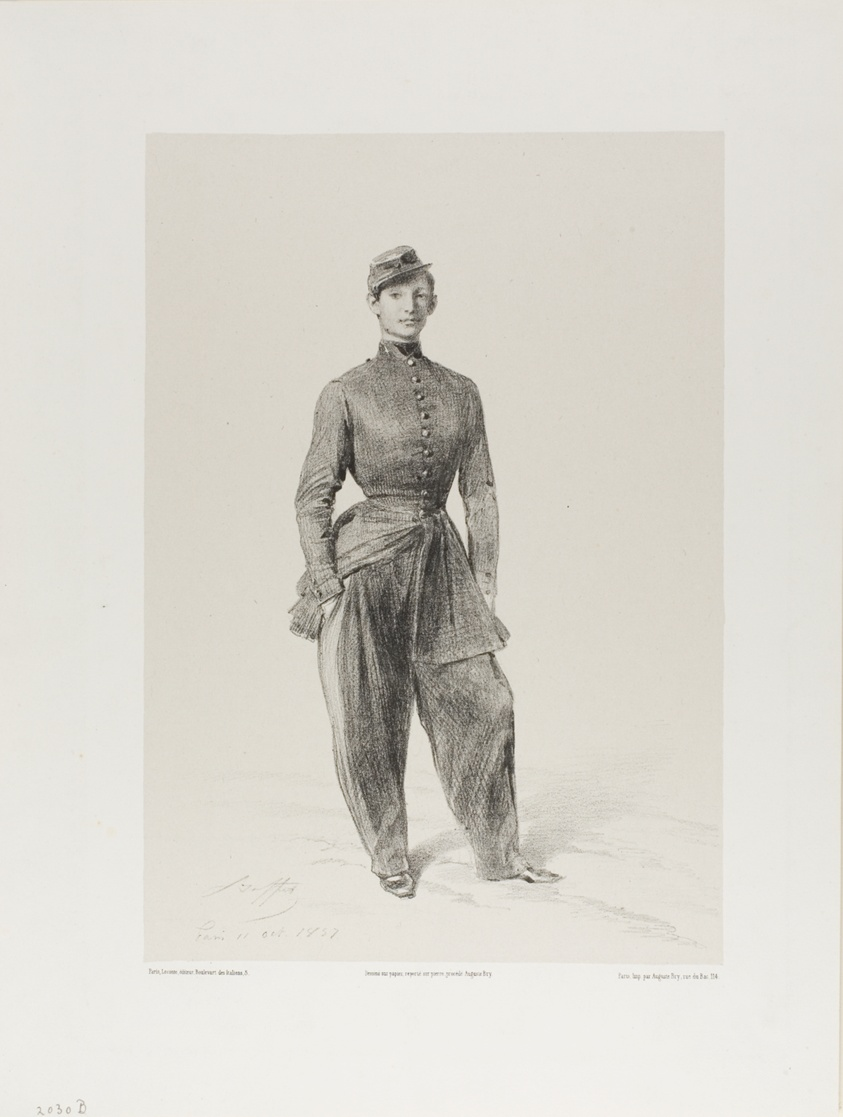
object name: Print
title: Portrait of Auguste Raffet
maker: Denis Auguste Marie Raffet (French, 1804-1860); printed by Auguste Bry (French, 19th century); published by Éditeur Leconte (French, 19th century)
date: 1857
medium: Lithograph in black on gray wove chine laid down on off-white wove paper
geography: France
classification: lithograph; print; prints and drawing